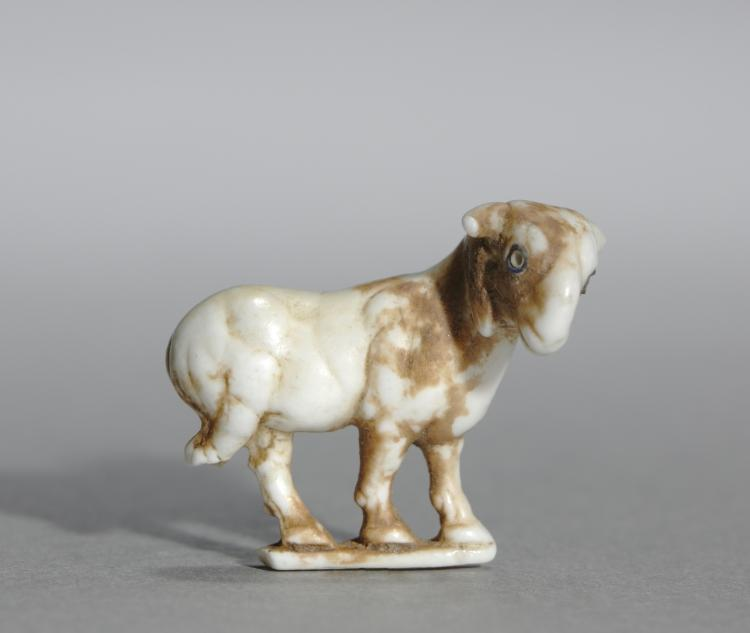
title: Striding Goat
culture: Sumerian, Iraq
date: c. 3200–3000 BCE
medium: limestone and Egyptian blue inlay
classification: Sculpture